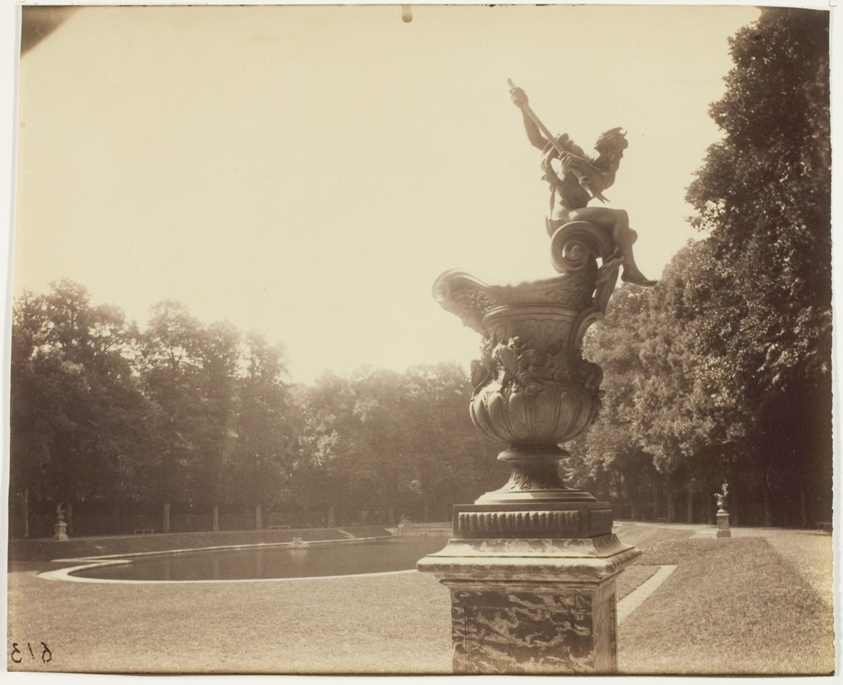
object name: Photograph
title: Versailles, Grand Trianon (Vase par Le Lorrain)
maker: Jean-Eugène-Auguste Atget (French, 1857–1927)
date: 1901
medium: Albumen print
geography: France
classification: albumen silver print; photographic process; photography; photograph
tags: Collected by Hugh Edwards